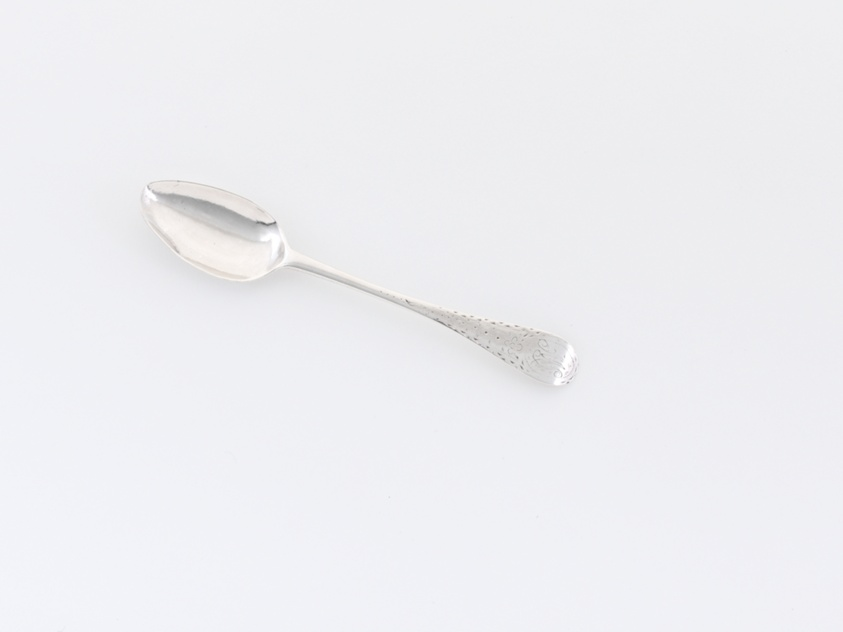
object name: Metalwork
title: Pair of Coffee Spoons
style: 18th Century, 19th century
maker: Artist unknown (American, 18th–19th century)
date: 1790–1812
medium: Silver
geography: United States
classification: spoon; silver; utensil; american decorative arts; american arts; decorative arts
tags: spoon, eating, dining